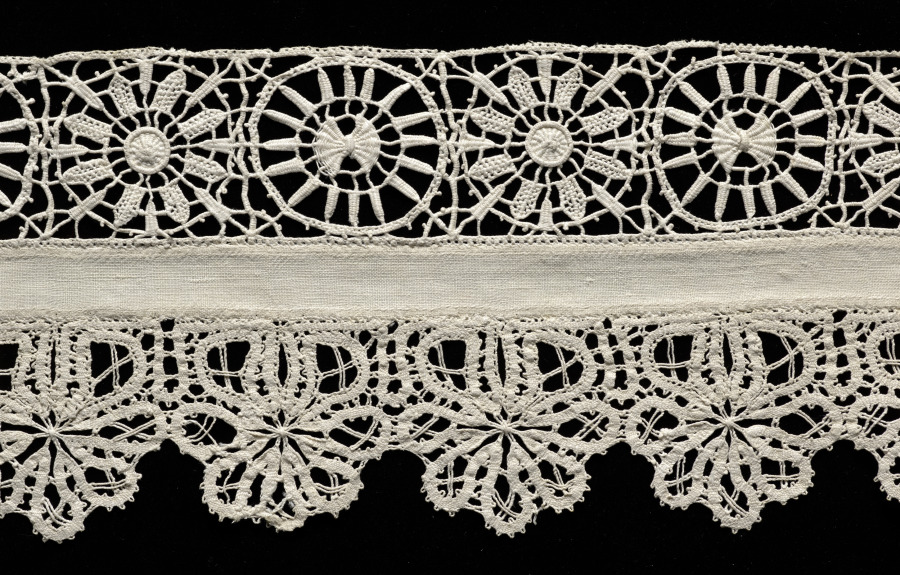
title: Lace Edging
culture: Italy, Genoa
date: 1600s–1700s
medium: Bobbin lace (tape lace)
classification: Lace